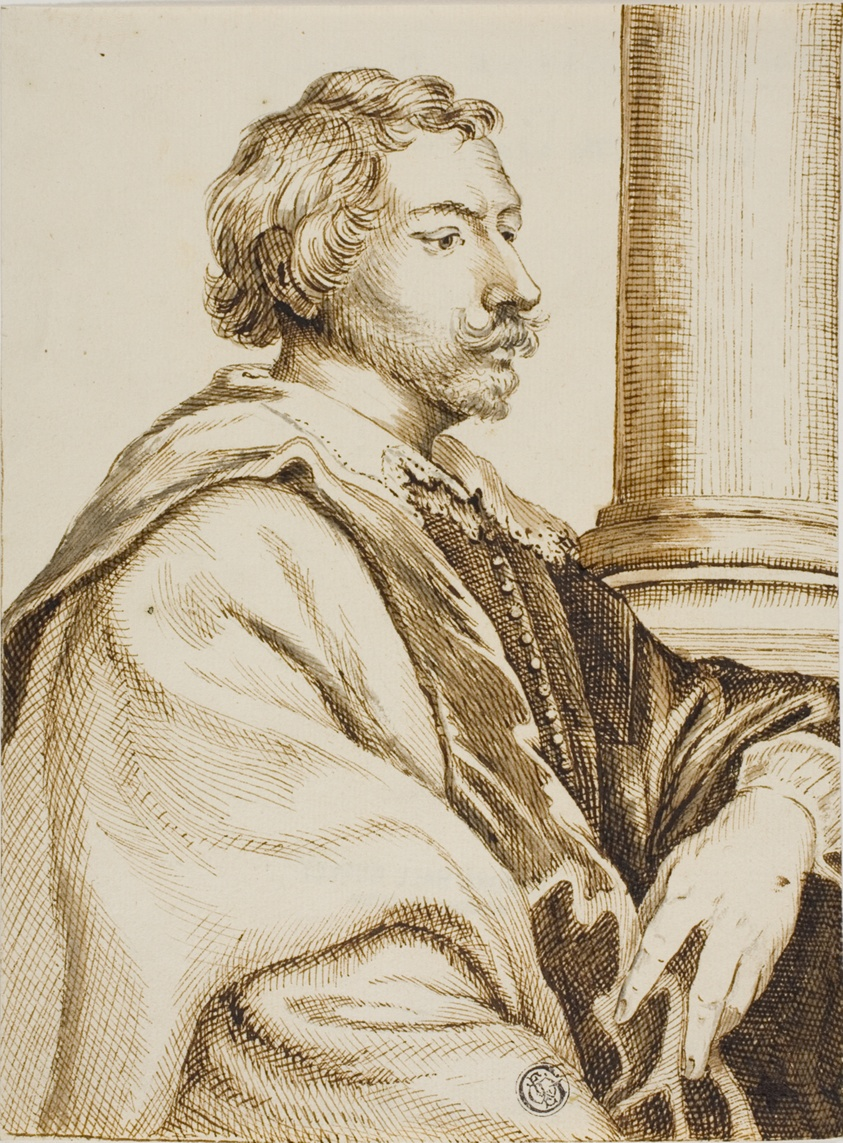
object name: Drawing and Watercolor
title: Cornelis Schut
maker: After Anthony van Dyck; Flemish, 1599-1641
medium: Pen and brown ink, with brush and brown and gray wash, on ivory laid paper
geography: Flanders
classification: pen and ink drawings; drawings (visual works); prints and drawing